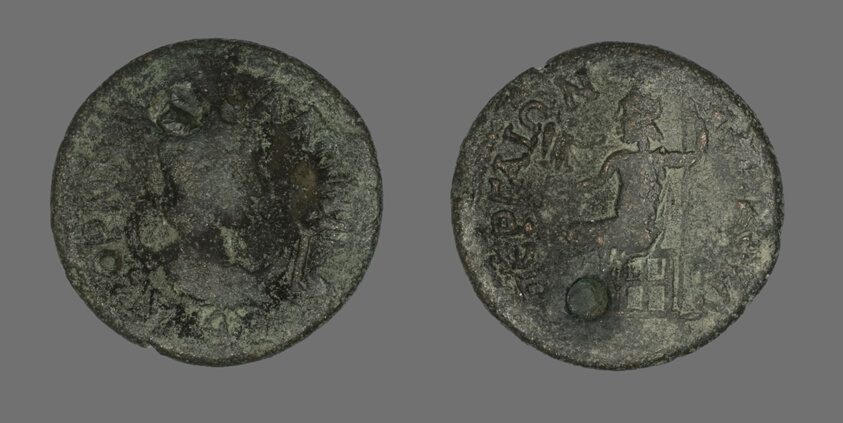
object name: Coin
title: Coin Portraying Empress Salonina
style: imperial (roman)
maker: Roman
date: 254-268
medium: Bronze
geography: Rome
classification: coin; ancient art